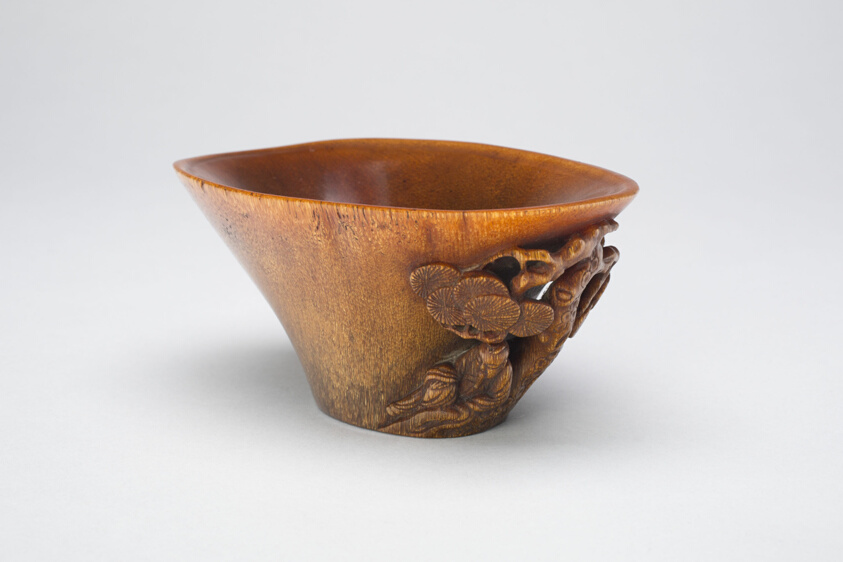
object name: Vessel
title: Cup with Handle in the Form of a Scholar Seated Beneath a Pine Tree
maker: China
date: Late Ming (1368–1644) or early Qing dynasty (1644–1911), 17th/18th century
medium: Rhinoceros horn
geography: China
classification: drinking vessel; rhinocerous horn; horn; vessel; asian art